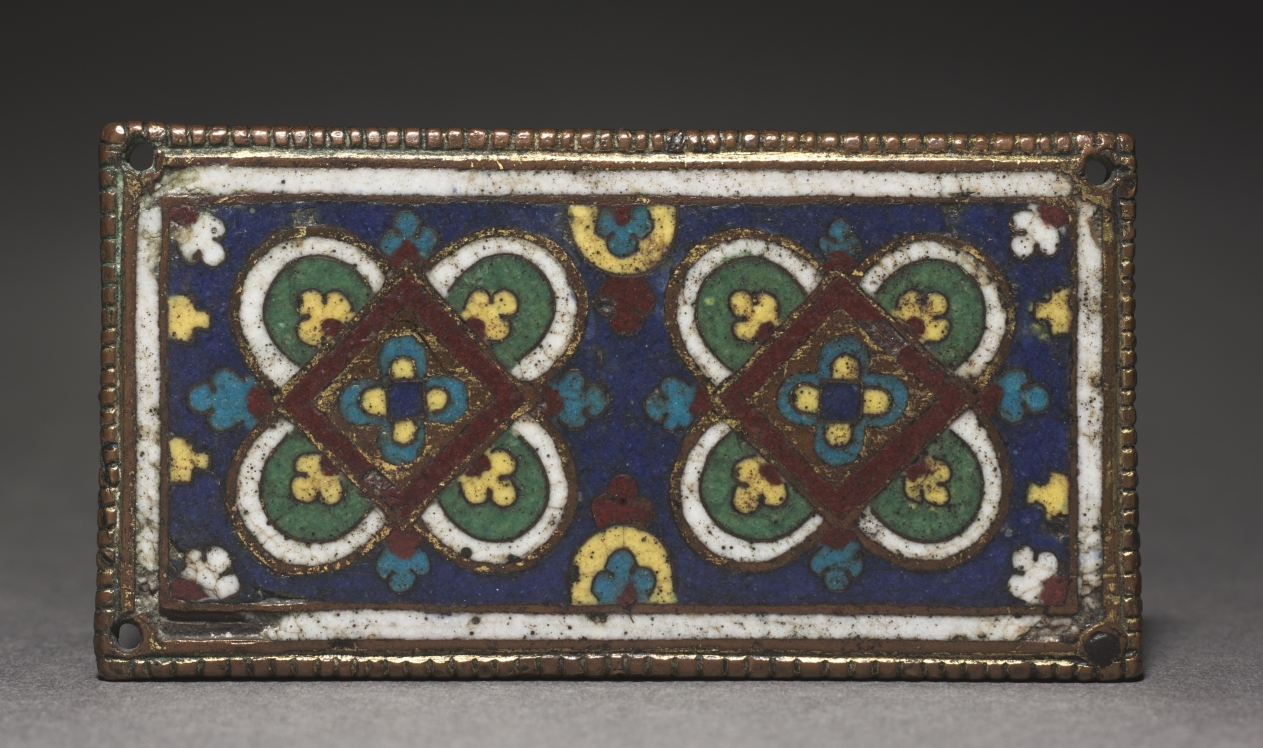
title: Plaque, probably from a Reliquary Shrine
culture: Germany, Aachen?, Gothic period, 13th century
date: 1225–1250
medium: gilded copper; champlevé enamel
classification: Enamel